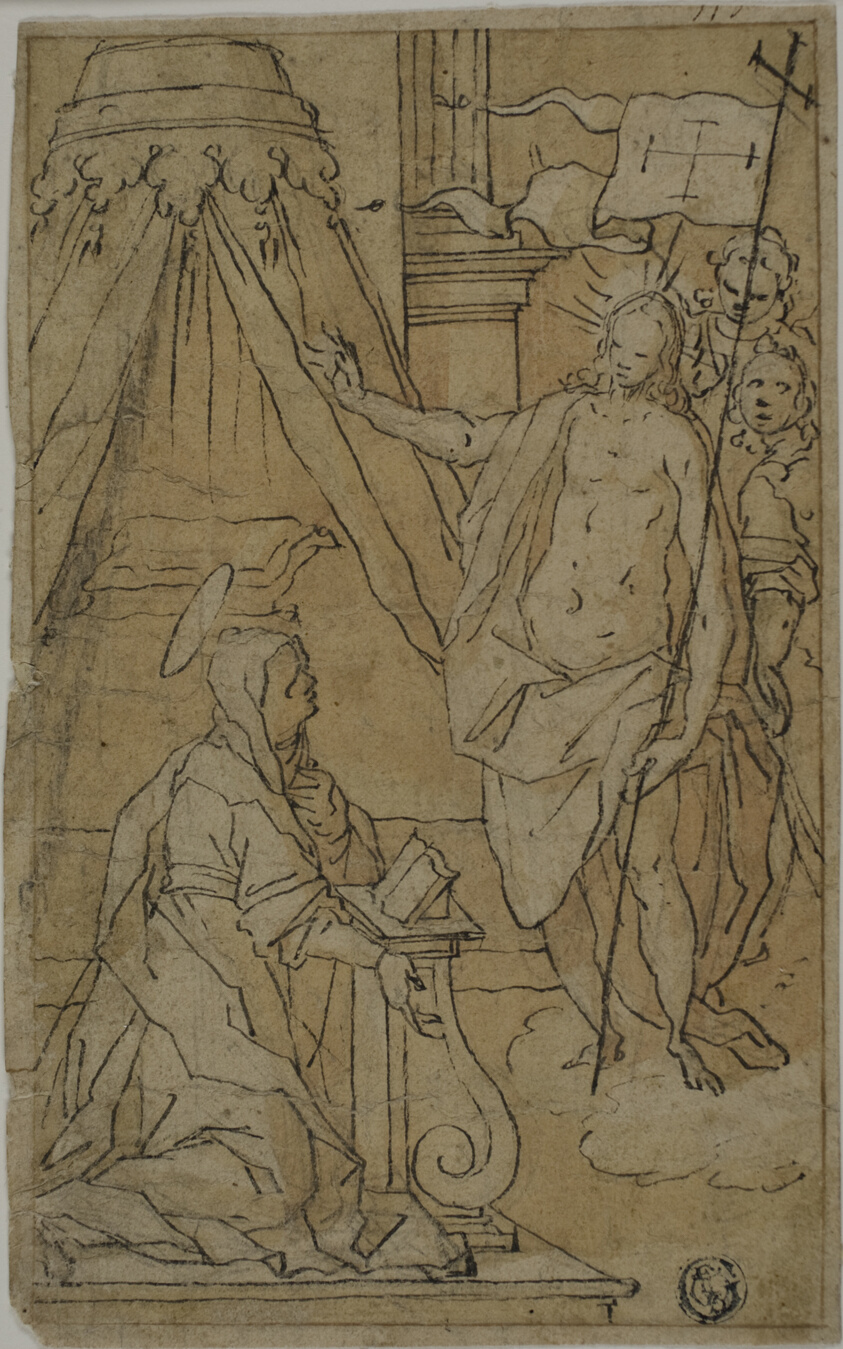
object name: Drawing and Watercolor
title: Christ Appearing to His Mother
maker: Attributed to Lazzaro Tavarone; Italian, 1556-1641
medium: Pen and black ink with brush and red-brown wash, over black chalk, on tan laid paper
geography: Italy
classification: ink with wash; drawings (visual works); prints and drawing